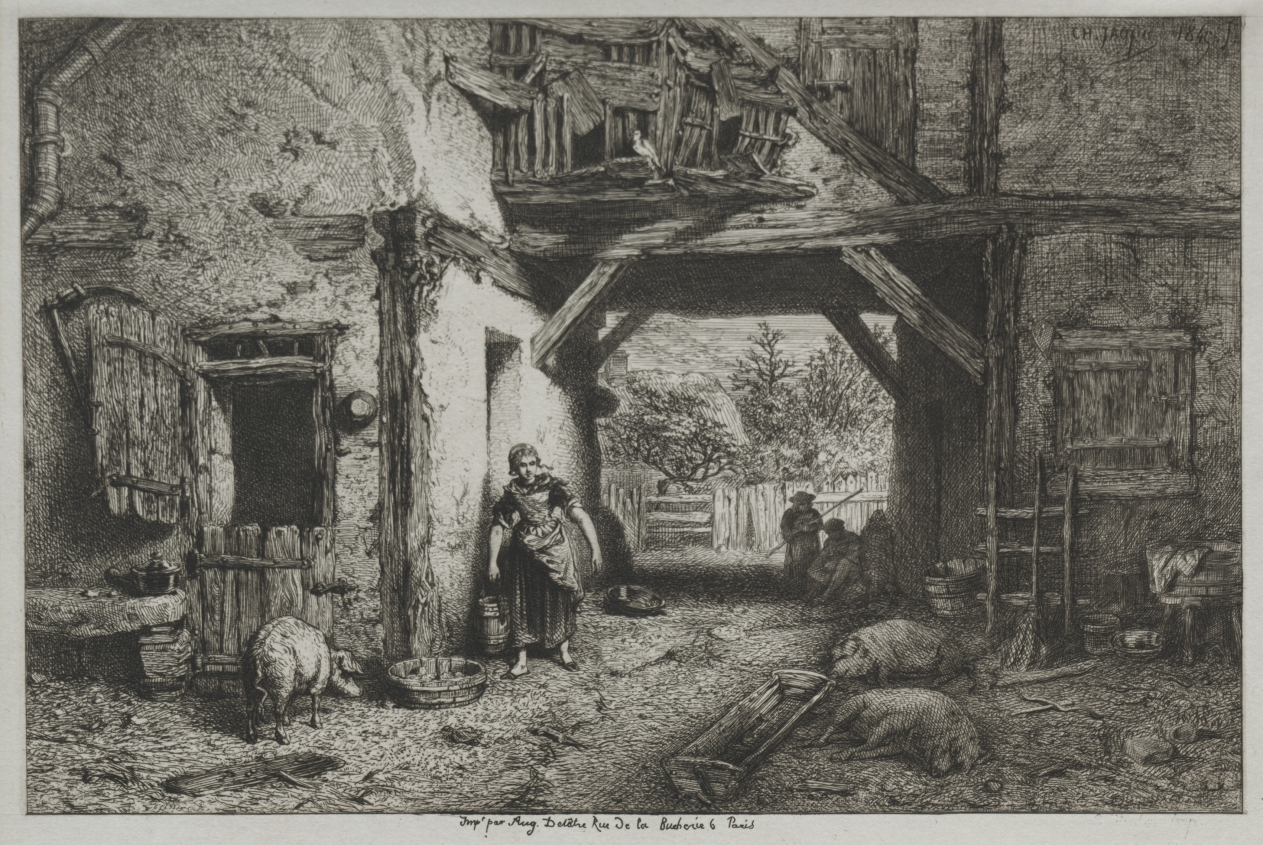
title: Farm Interior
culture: France, 19th century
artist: Charles-Émile Jacque (French, 1813–1894)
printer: Auguste Delâtre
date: 1845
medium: etching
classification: Print